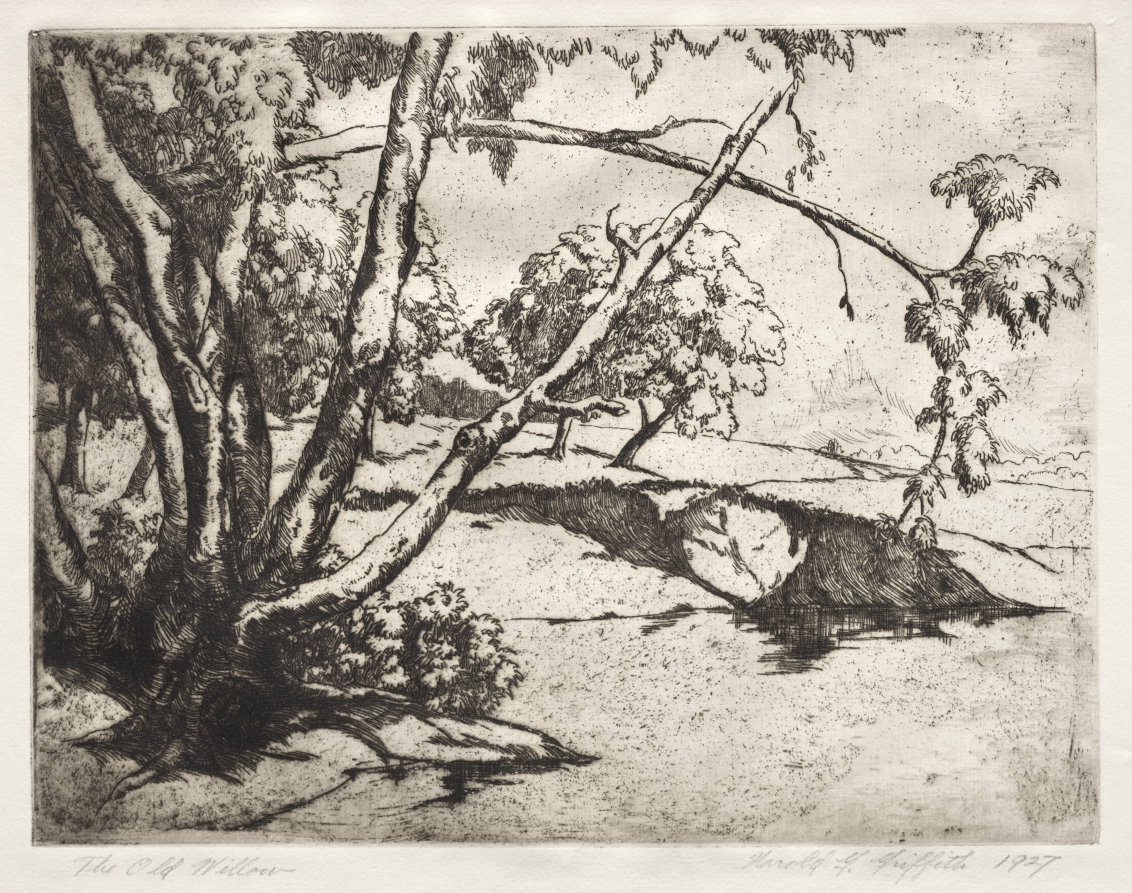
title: The Old Willow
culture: America, Ohio, Cleveland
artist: Harold G. Griffith (American, 1904–1996)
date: 1927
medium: etching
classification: Print